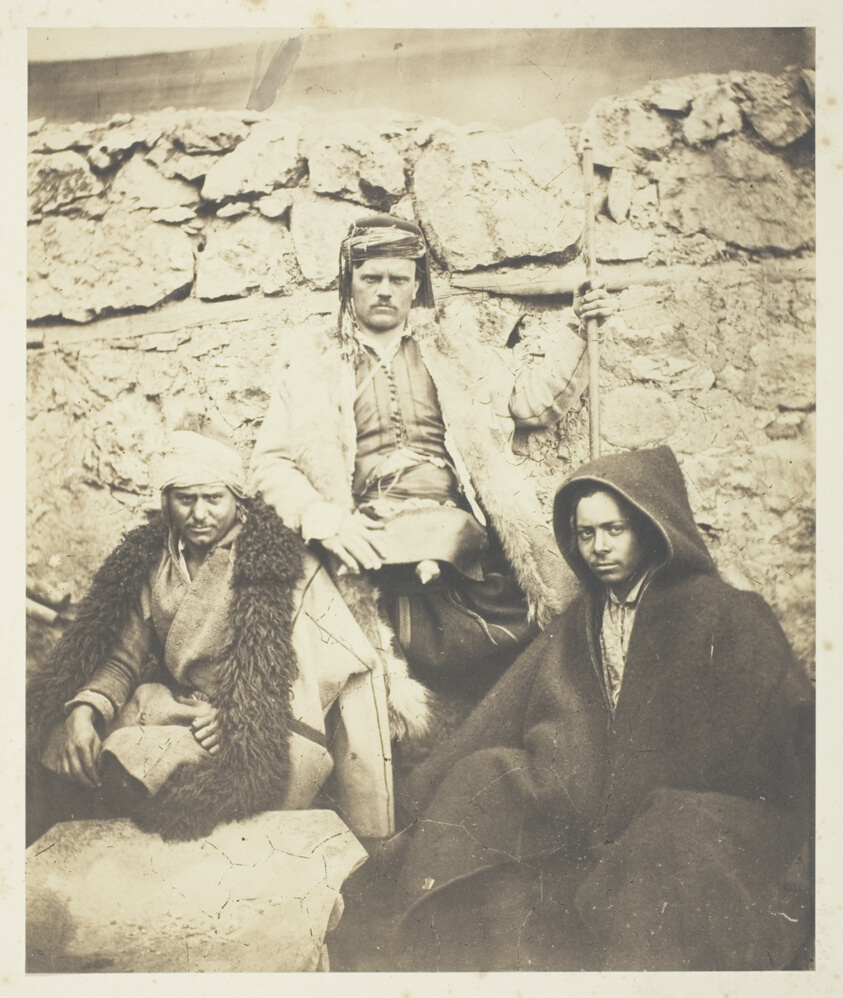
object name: Photograph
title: Group of Croat Chiefs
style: 19th century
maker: Roger Fenton (English, 1819–1869)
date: 1855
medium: Salted paper print, plate 2 from the album "Photographs Taken in the Crimea" (1856)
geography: England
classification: salted paper print; photographic process; photography; photograph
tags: Collected by Hugh Edwards, Crimea 1856